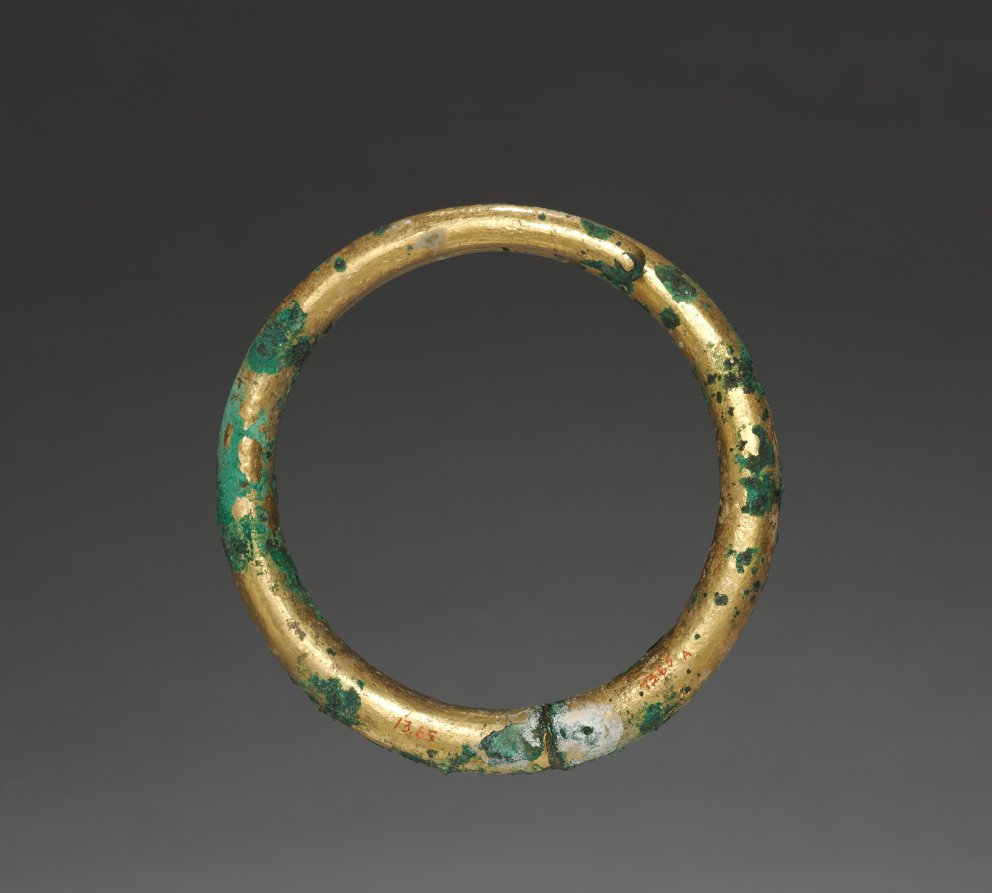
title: Bangle (2 of 2)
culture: India, Shunga period (185–78 BCE)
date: 185–72 BCE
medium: gilt bronze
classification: Jewelry